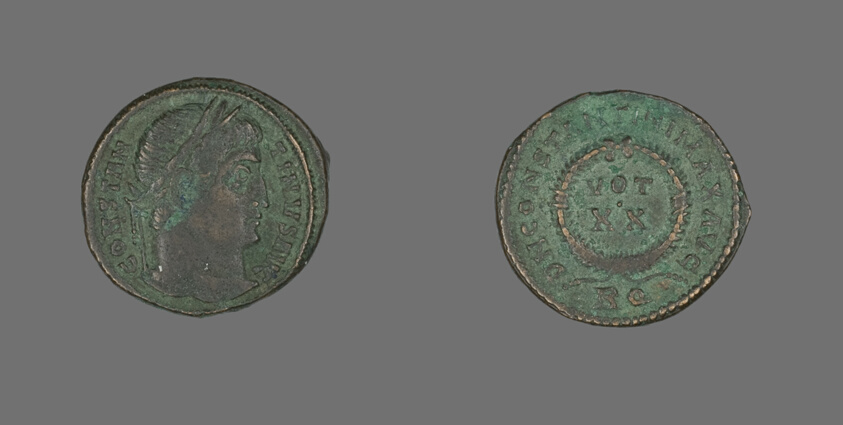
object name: Coin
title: Coin Portraying Emperor Constantine I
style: roman (ancient, style or period)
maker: Roman, minted in Rome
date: 321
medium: Bronze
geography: Roman Empire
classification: coin; ancient art